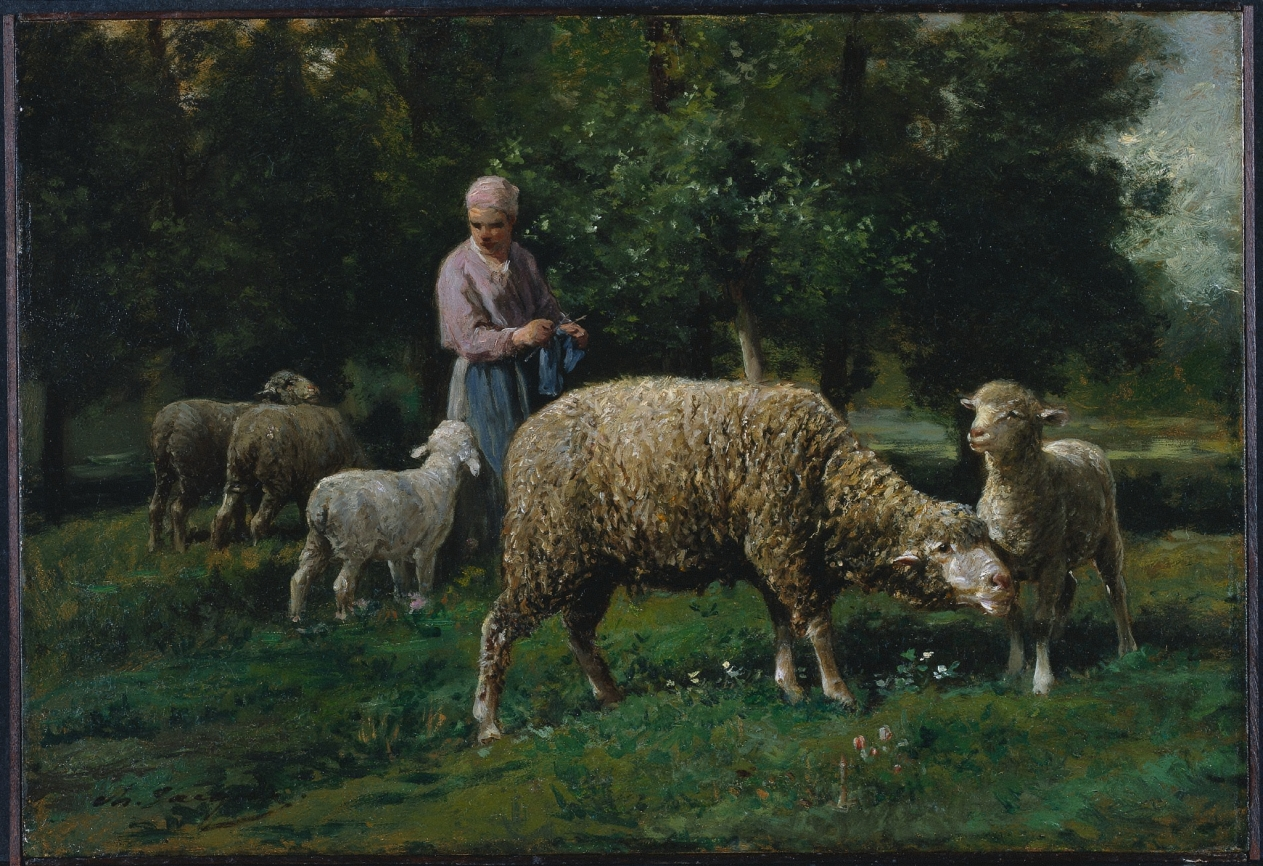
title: Shepherdess with Sheep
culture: France, 19th century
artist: Charles-Émile Jacque (French, 1813–1894)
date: c. 1876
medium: oil on wood panel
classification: Painting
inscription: Signed lower left: ch. Jacque